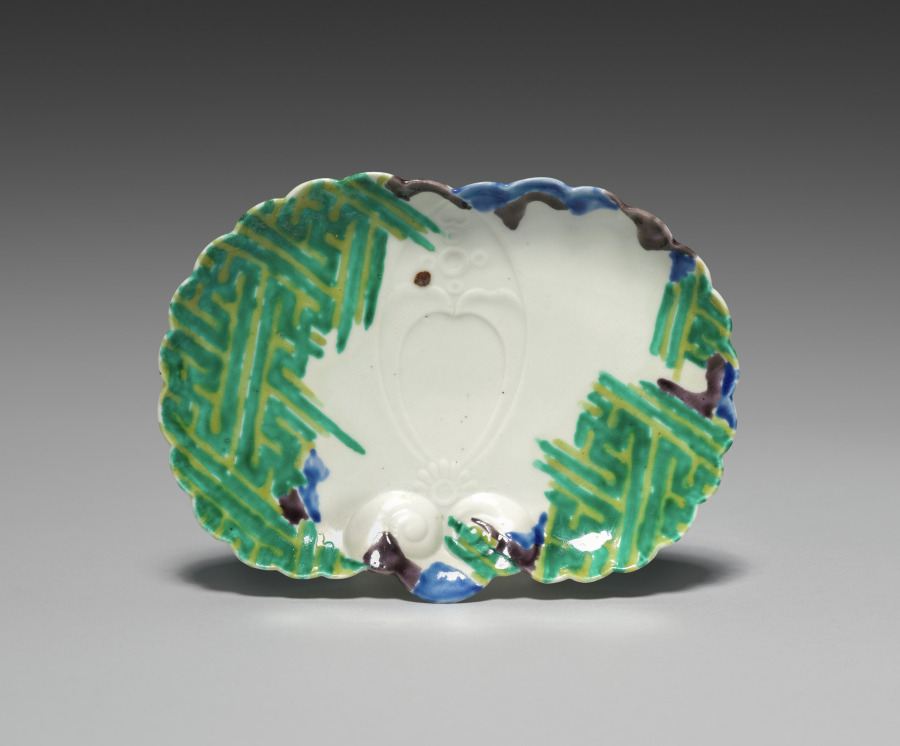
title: Ginkgo Leaf-Shaped Small Dish (Kozara) with Stylized Key-Fret Design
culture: Japan, Edo period (1615–1868)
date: mid-1600s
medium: Porcelain with molding and overglaze color enamel (Hizen ware, Matsugatani kilns, Nabeshima type)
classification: Ceramic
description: This dish combines a precisely molded shape with a freehand design in overglaze color enamels.